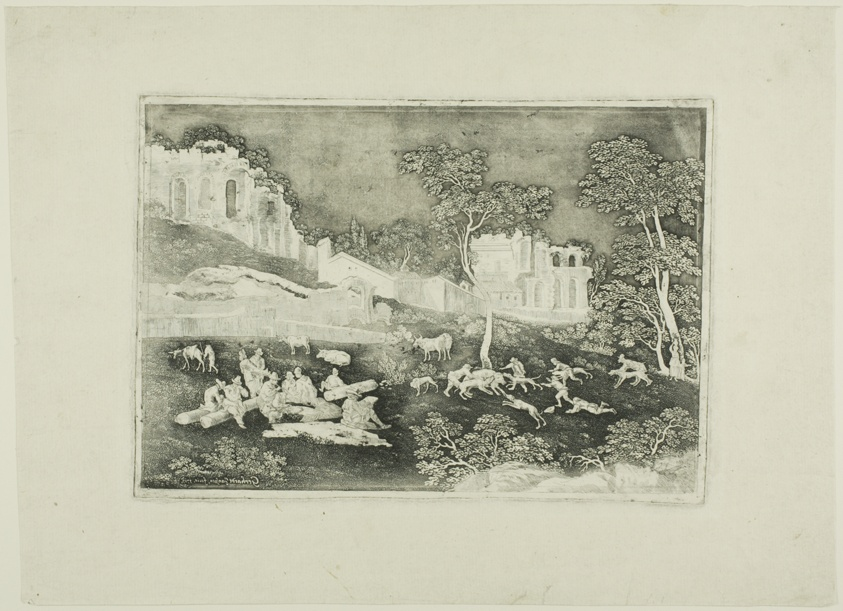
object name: Print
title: Boar Hunt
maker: Gerhard Janssen (Dutch, 1636-1725)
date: 1717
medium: Etching and aquatint on ivory laid paper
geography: Netherlands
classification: etching; print; prints and drawing